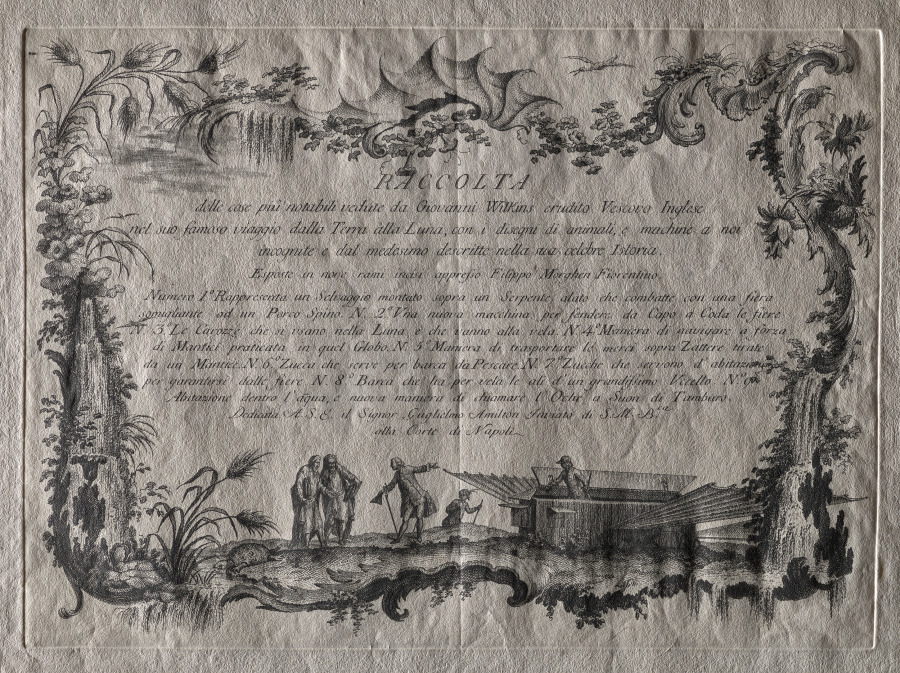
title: Title and Dedication Page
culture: Italy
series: Suite of the Most Notable Things Seen by John Wilkins Erudite English Bishop during His Famous Voyage from the Earth to the Moon … dedicated to Sir William Hamilton ambassador to the Court of Naples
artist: Filippo Morghen (Italian, 1730–after 1807)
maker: possibly after Jean-Pierre-Louis-Laurent Hoüel (French, 1735–1813)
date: about 1769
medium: etching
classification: Print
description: Filippo Morghen’s set of 10 etchings is outstanding among visual narratives of imaginary voyages to the moon, both visual and literary, that intrigued 18th-century European audiences. A title page and nine plates depict the imagined lives and economy of moon dwellers. These include modes of transport such as large birds and sailboats propelled by giant bellows, enormous scissors for capturing wild beasts (including an oversized rat), and the use of giant pumpkins as fishing boats and as dwellings. Representations of the moon dwellers are based on inaccurate and imaginary European interpretations of Asian, Ottoman, and Native American cultures—called chinoiserie and turquerie—that permeated the decorative and visual arts of the period.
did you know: Morghen based this print series on three books dedicated to moon exploration, including Bishop Francis Godwin’s Man in the Moone of 1640.